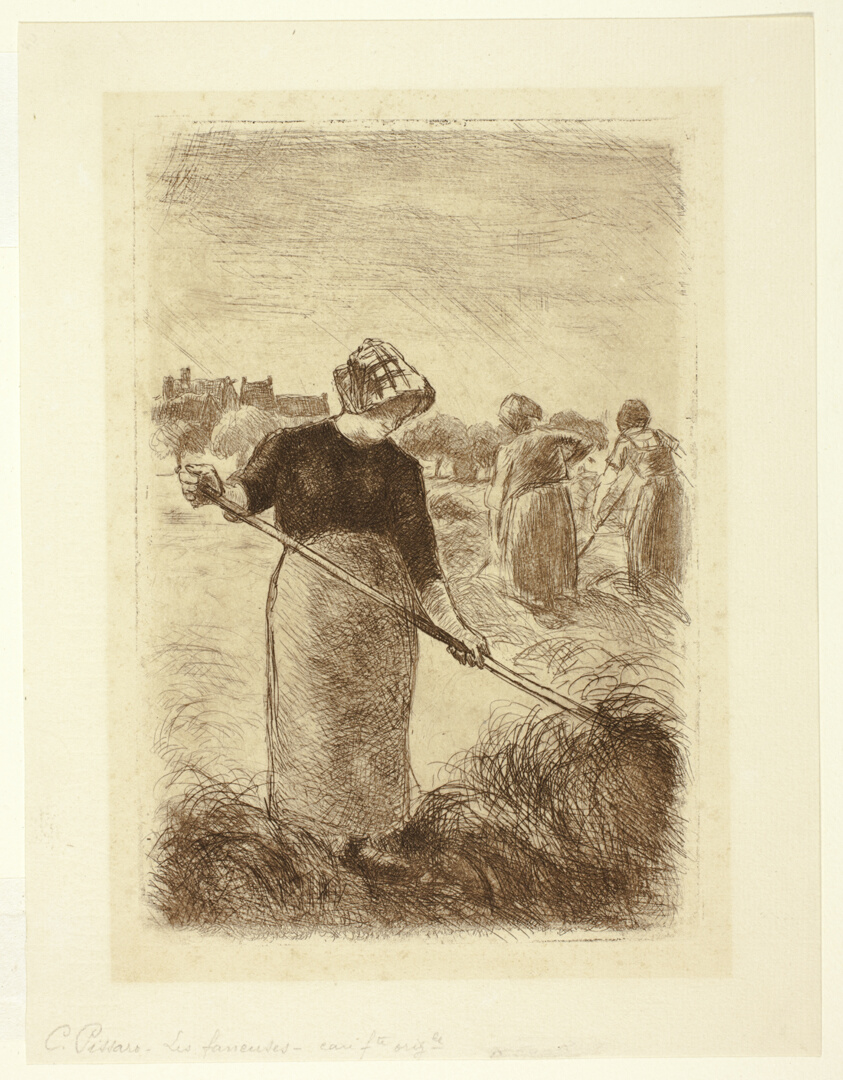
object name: Print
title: Women Tossing the Hay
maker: Camille Pissarro (French, 1830-1903)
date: 1890, printed 1906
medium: Etching in dark brown on cream laid paper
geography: France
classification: etching; print; prints and drawing